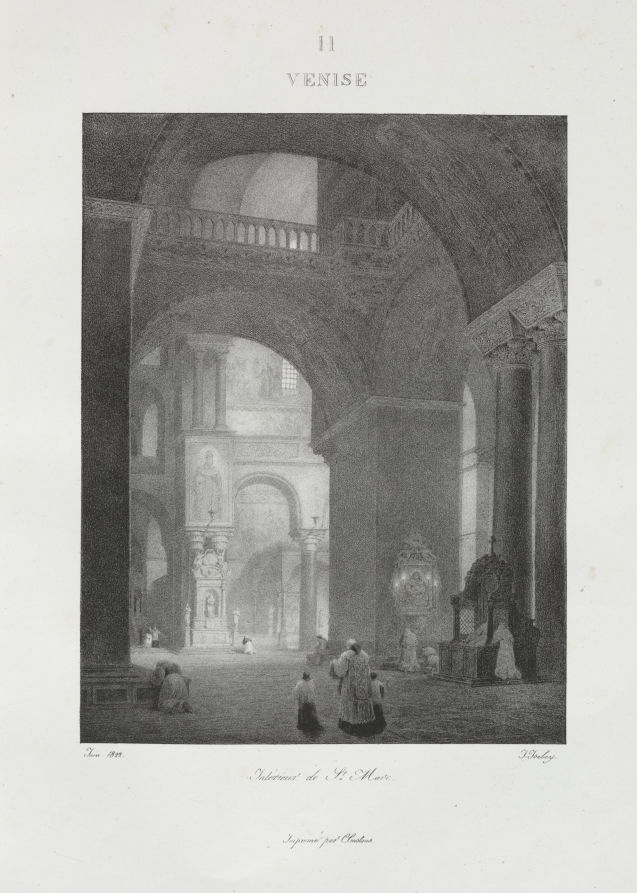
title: Voyage en Italie en 1822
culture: France, 19th century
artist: Jean-Baptiste Isabey (French, 1767–1855)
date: 1833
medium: lithograph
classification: Bound Volume